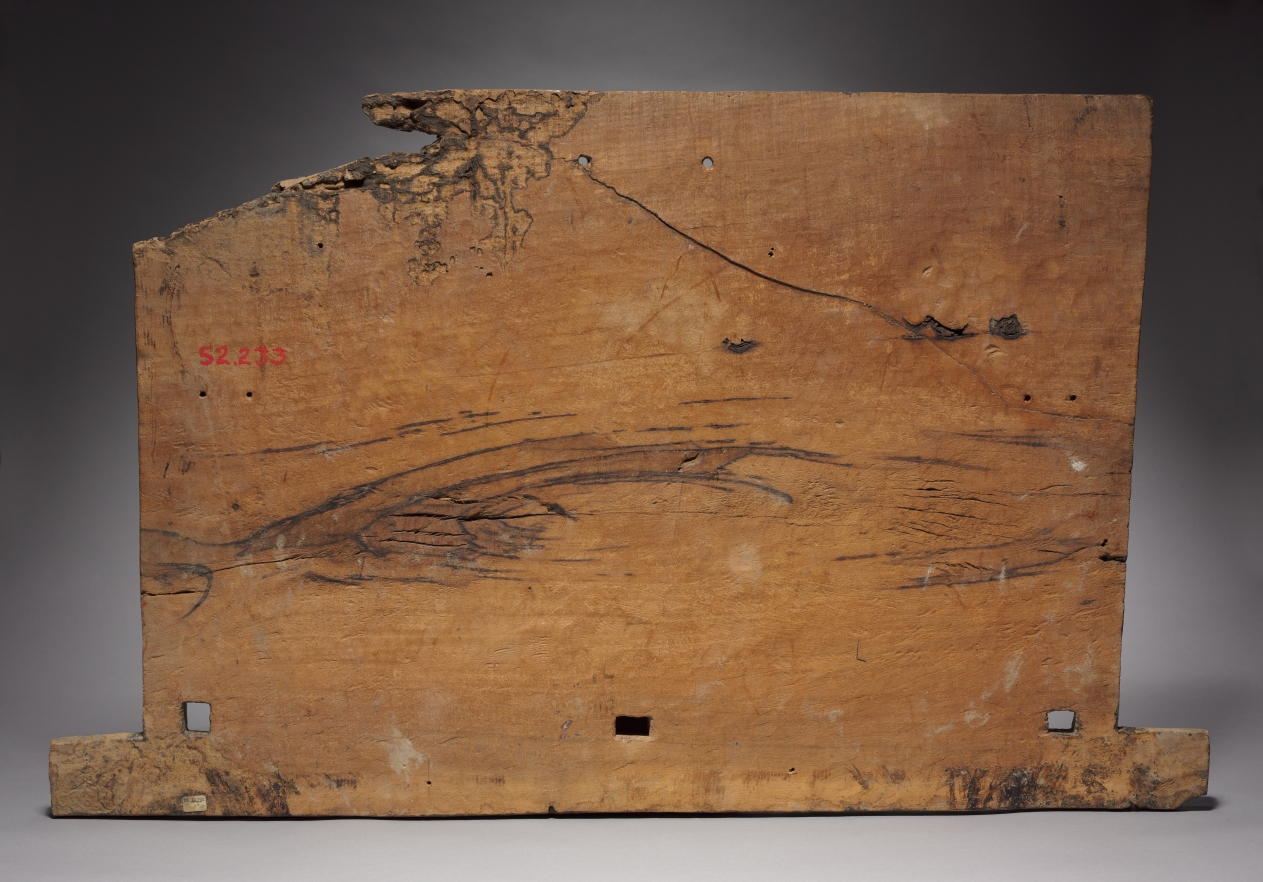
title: Backrest of a Litter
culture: Central Andes, North Coast, Chimú people, late Intermediate period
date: 1185–1275 (radiocarbon date, 95.4% probability)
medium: mixed media: wood, gold alloy, pigment, shell inlay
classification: Sculpture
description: This rare, dramatic object served as the back support of a litter carried by human porters, a mode of transport reserved for honored members of many societies without draft animals or wheeled vehicles. The simple, bold figures—perhaps a Chimú lord and four officials—all wear wide collars, tunics, and crescent headdresses that are either brightly painted or covered with golden but now-corroded sheet metal. The holes at the bottom probably served as lashing points for a beam that supported the litter's seat.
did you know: Cinnabar, a toxic mercuric sulfide, was used to color the red background and faces of the figures.